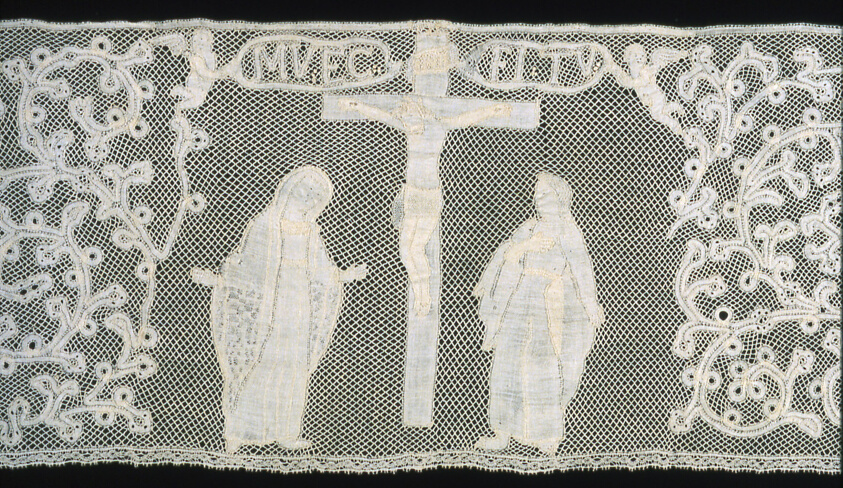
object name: Textile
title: Border (From an Altar Cloth)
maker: Italy, Milan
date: 1725/75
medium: Linen, bobbin part lace; embellished with glass beads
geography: Milan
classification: textile; lace - bobbin